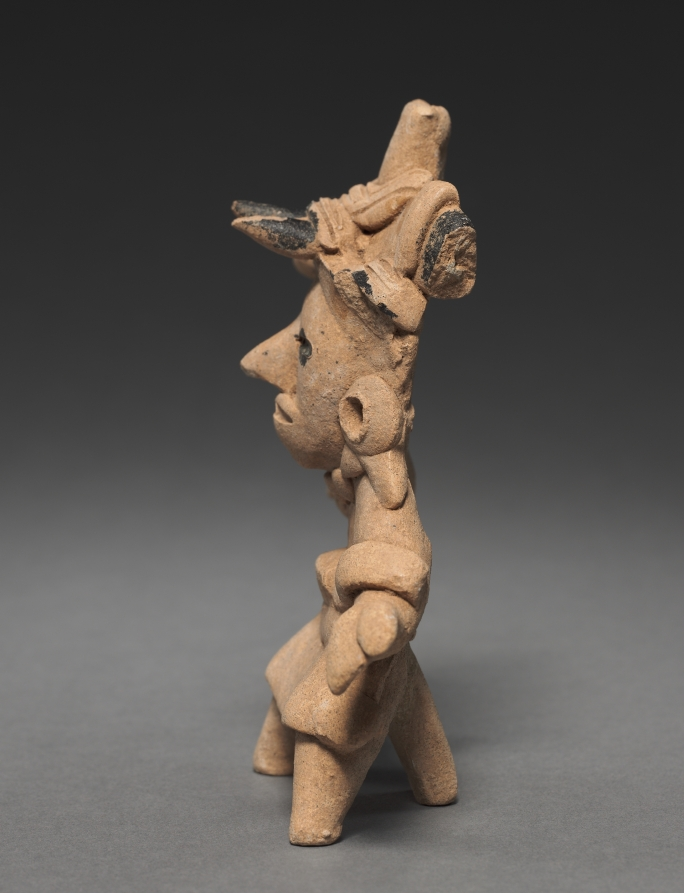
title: Tripod Whistle Figurine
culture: Mexico, Veracruz, Remojadas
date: c. 150–1 BCE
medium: earthenware with asphalt paint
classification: Sculpture